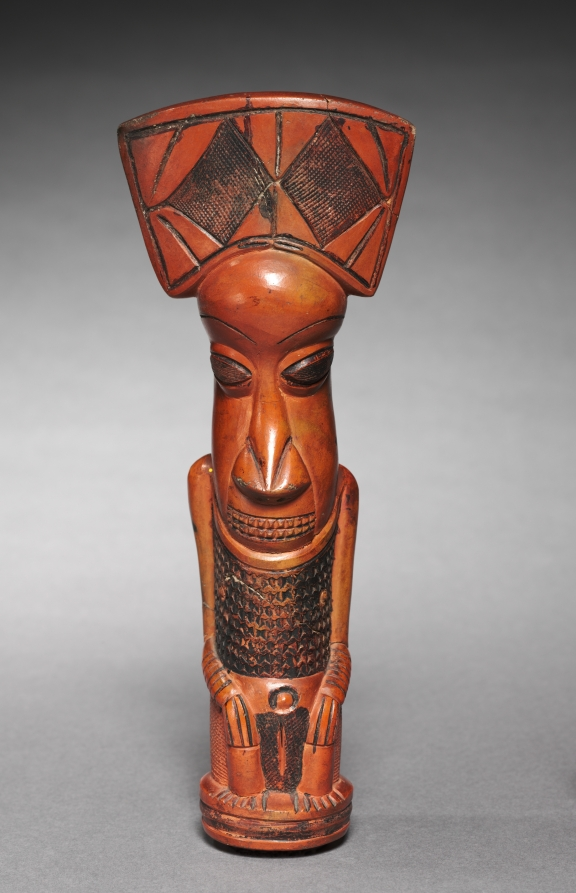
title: Pipe Bowl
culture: Equatorial Africa, Cameroon, Bali, 20th century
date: before 1935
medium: Ceramic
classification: Implements